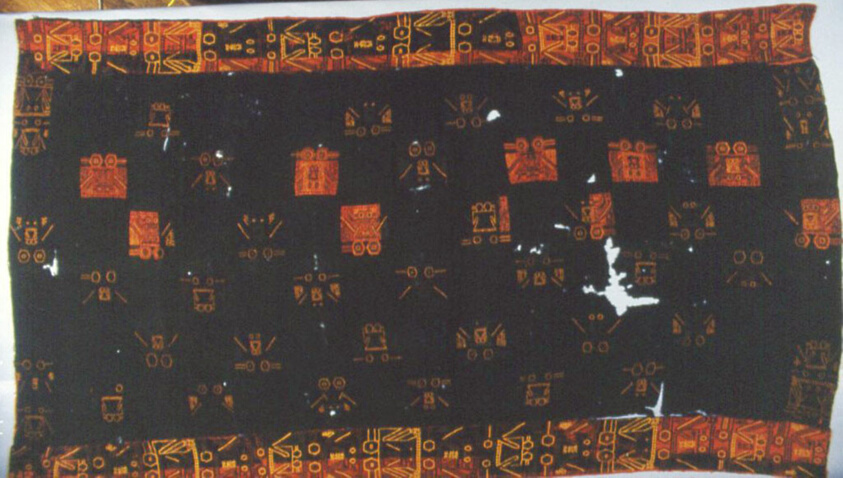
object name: Textile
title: Unfinished Mantle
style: paracas, early horizon, Pre-Columbian, americas, andean, andes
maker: Paracas (Possibly Ica or Nazca Valley, south coast, Peru)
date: 100 B.C./A.D. 200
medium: Wool (camelid), plain weave; embroidered in overcast and stem stitches; edged with cross-knit loop stitches.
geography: Peru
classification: textile; needlework (visual works)